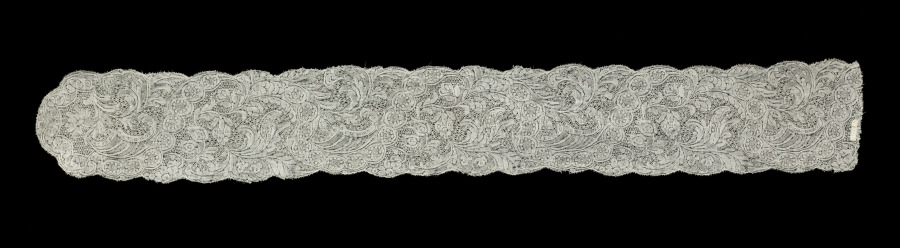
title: Lace Lappet (one of a pair)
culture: Belgium, Binche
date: 1700s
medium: Linen: bobbin lace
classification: Lace